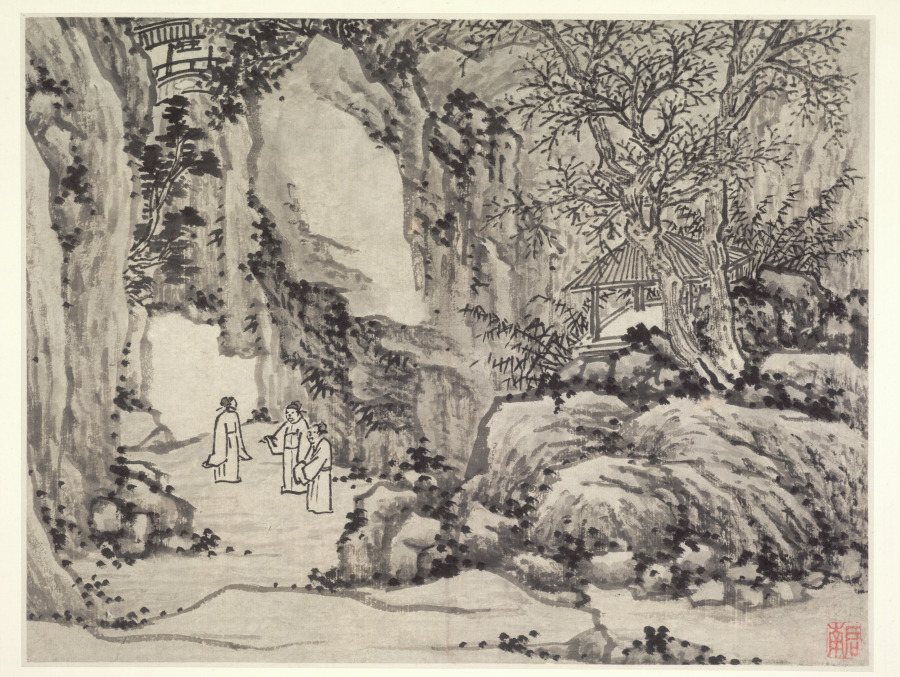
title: The Sword Spring, Tiger Hill, from Twelve Views of Tiger Hill, Suzhou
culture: China, Ming dynasty (1368–1644)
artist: Shen Zhou (Chinese, 1427–1509)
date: after 1490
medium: Album leaf; ink on paper or ink and slight color on paper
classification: Painting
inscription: [印] 启南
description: Views of Tiger Hill depicts a historic site a few miles northwest of Suzhou. The scenes simulate a visit from arriving by boat at the foot of the mountain to climbing to Cloudy Cliff Monastery. Representations of the artist’s mature style, Shen Zhou included views in subtle colors in the suite of monochrome scenes. A Suzhou native, Shen Zhou was supported by family wealth and rejected an official career in favor of life as a retired scholar. Turning to painting in midlife, he is regarded as the founder of the Wu School of painting, with its center in Suzhou.